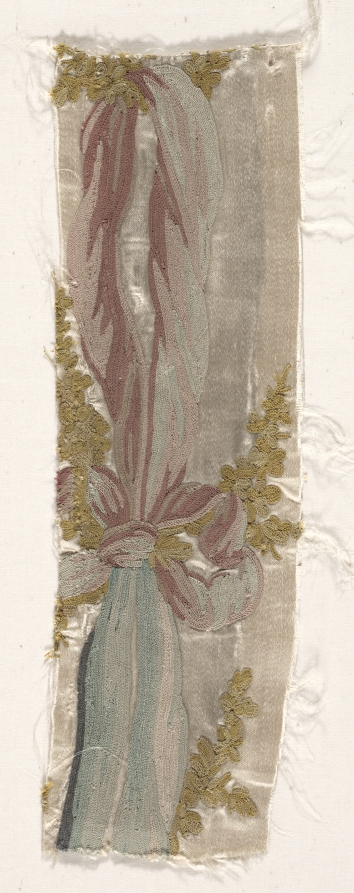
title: Coverlet Fragment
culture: France, 18th Century, period of Louis XVI (1774-1793)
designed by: Philippe de Lasalle (French, 1723–1805)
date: c. 1760–1770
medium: embroidered satin and silk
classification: Textile